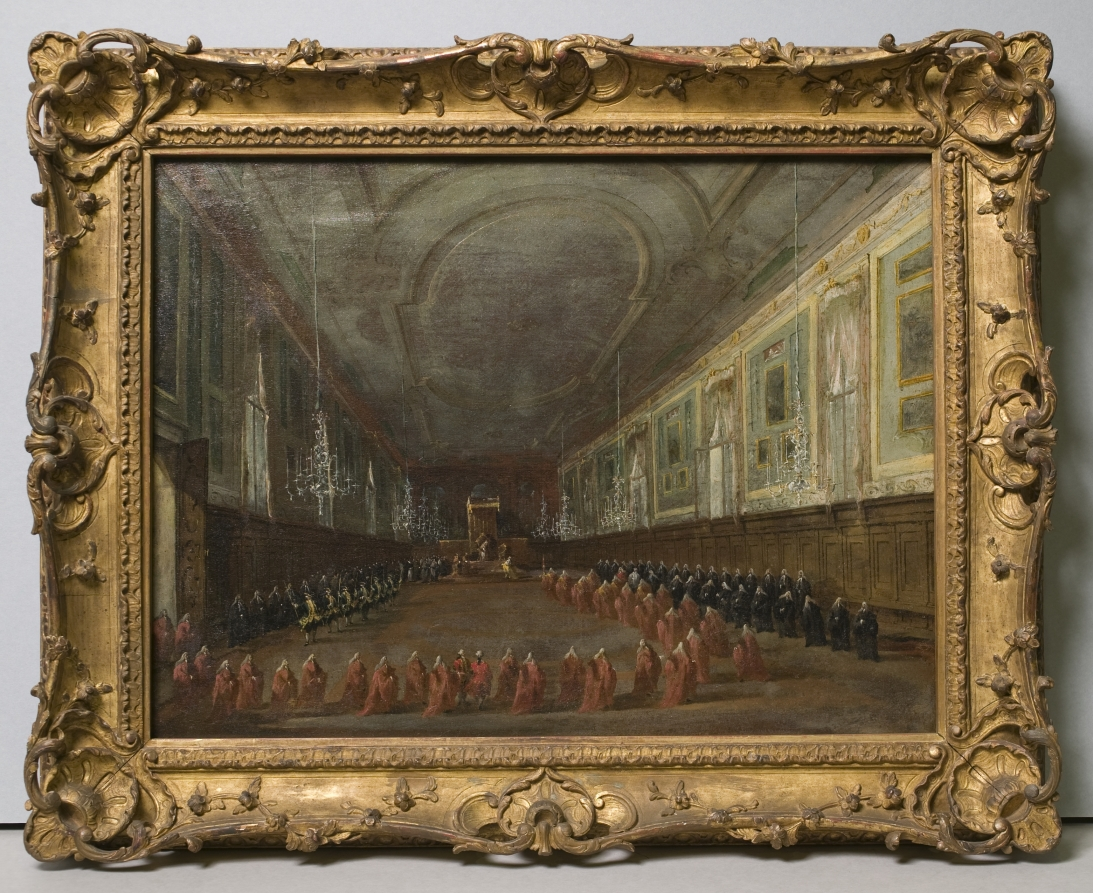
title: Pope Pius VI Descending the Throne to Take Leave of the Doge in the Hall of SS. Giovanni e Paolo, 1782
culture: Italy, 18th century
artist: Francesco Guardi (Italian, 1712–1793)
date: c. 1783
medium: oil on canvas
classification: Painting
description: The third scene in the series depicts one of the final events of the pope’s stay. At the back of the magnificent audience hall of Santi Giovanni e Paolo, the doge (in gold and white) approaches the throne to receive his papal blessing, with a line of red-robed senators in his wake.